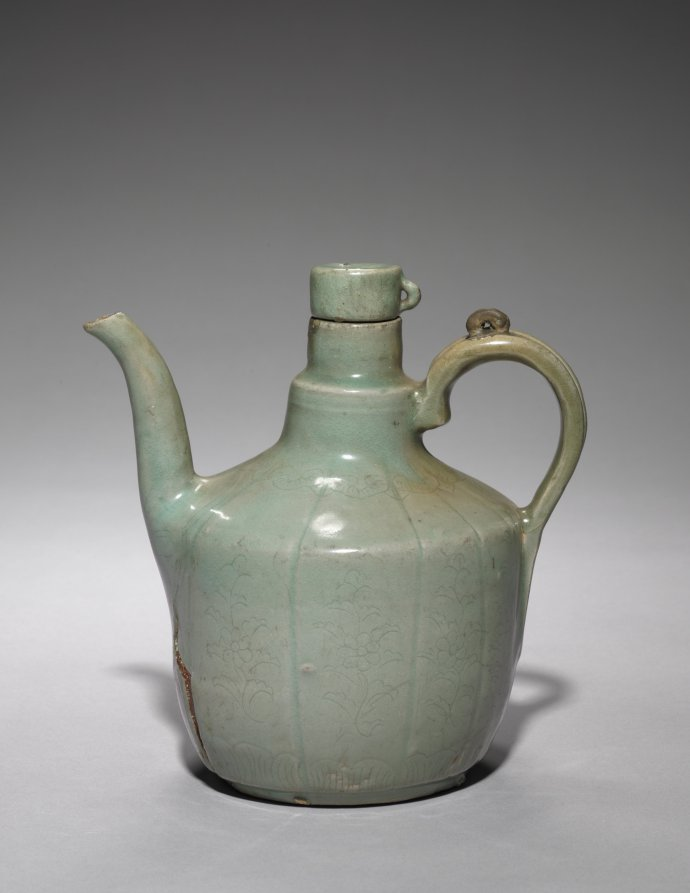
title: Wine Pot with Incised Chrysanthemum Design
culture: Korea, Goryeo dynasty (918–1392)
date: 1100s-1200s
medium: pottery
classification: Ceramic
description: As early as the seventh century, the practice of drinking tea and wine became an important part of elite culture in Korea. Elites of the Goryeo period commissioned a variety of types of utensils and vessels including this elegant wine pot, not only to make their drinking experience more exciting, but also to show their appreciation of nature.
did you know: A chain or cord once connected a small loop on the handle and the lid to serve beverages without spilling.